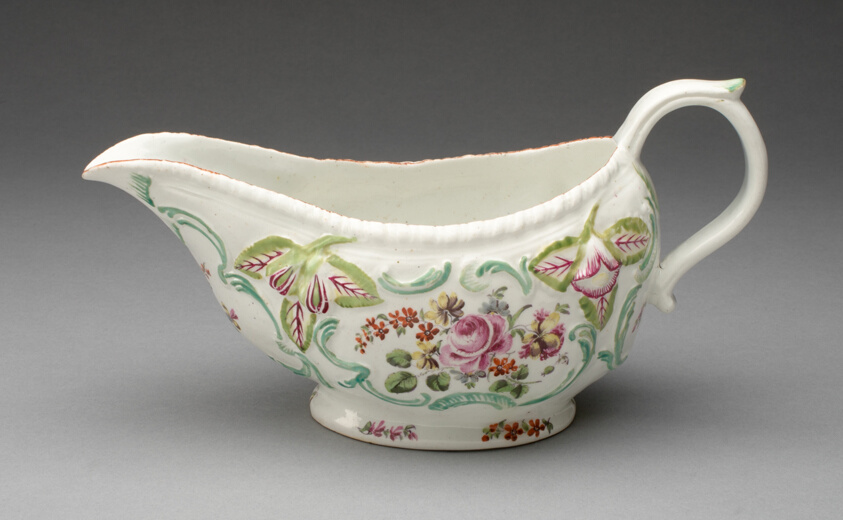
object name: Ceramics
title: Sauceboat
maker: England, Chelsea or Derby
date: 1760/70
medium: Soft-paste porcelain, polychrome enamels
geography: Chelsea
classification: porcelain; european decorative arts; ceramics